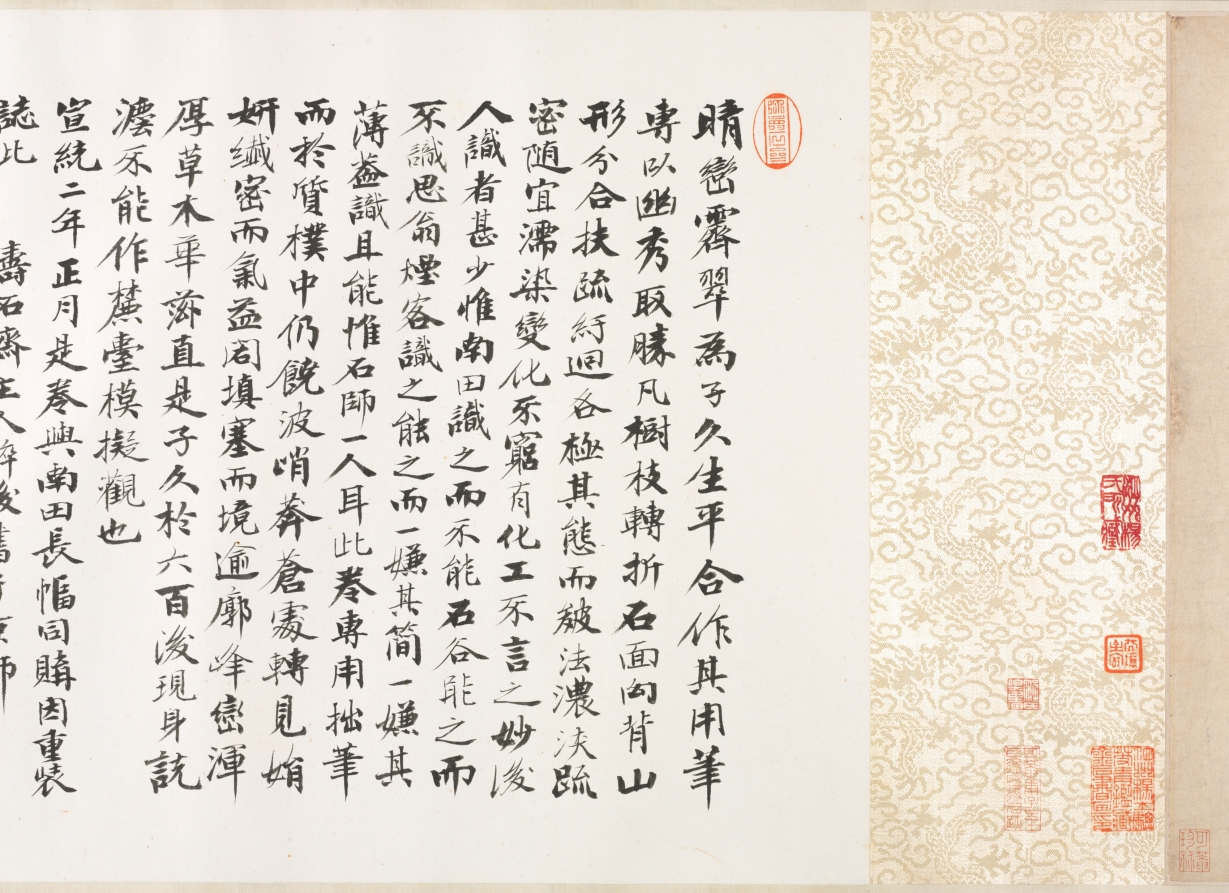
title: Green Peaks under Clear Sky: After Huang Gongwang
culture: China, Qing dynasty (1644-1911)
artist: Wang Yuanqi (Chinese, 1642–1715)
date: 1703–8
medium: handscroll; ink and light color on paper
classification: Painting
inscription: 晴巒霽翠：倣黃子久。麓臺。[印]石師道人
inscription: [印] 御書畫圖留與人看. 子久畫於宋諸大家荊、關、李、范、董、巨，無所不有。運筆不假修飾。皴法由淡入濃，化諸家之迹者也。澹明徐君偶見縮本，臨摹六幅。囑余參以富春大意，成一長卷。余夙夜在公，乘暇偶一點染。至戊子九秋告竣，閱四、五年矣。昔大癡為無用師作富春卷，七年而成，為千古鉅觀。今拙筆癡鈍。亦淹留至此。可為識者噴飯矣。王原祁題。[印]王原祁印; 麓臺 [印, 畫芯左下] 西廬後人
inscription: 3 additional colophons and 15 additional seals: 1 colophon and 9 seals of Yang Shicong 楊士驄 (b. 1870); 1 colophon of Wu Hufan 吳湖帆 (1894–1968); 1 colophon and 1 seal of Wu Mei (20th c.); 5 seals of Cheng Qi 程琦 (1911–1988).